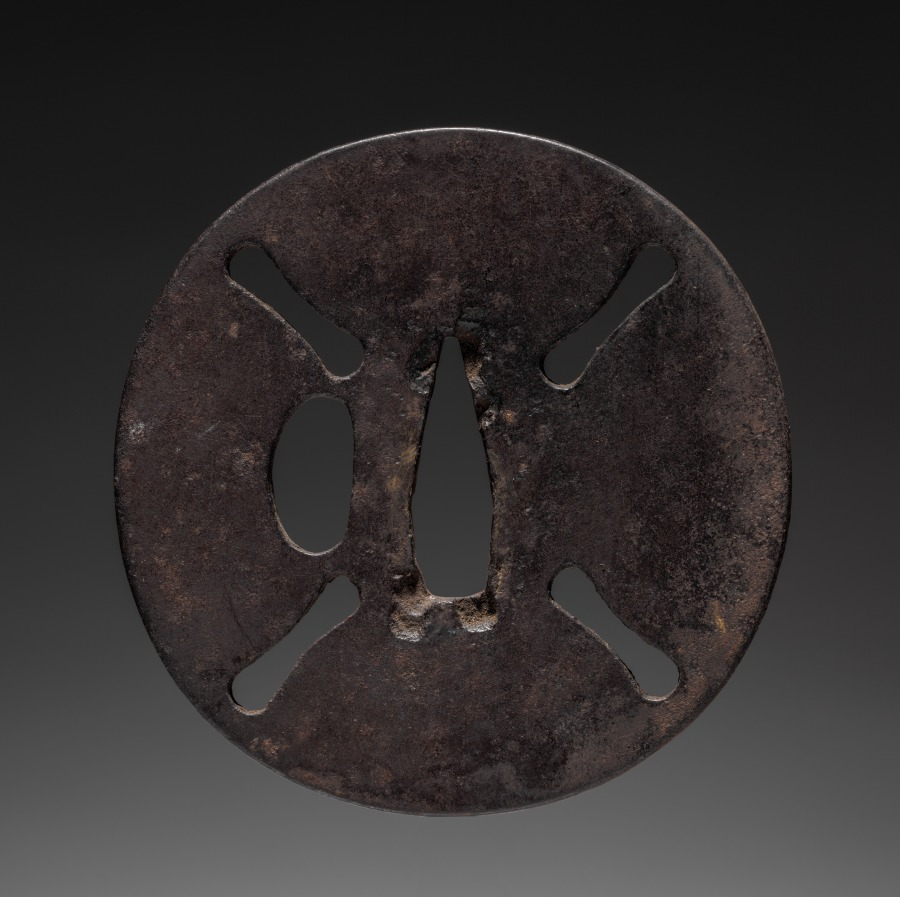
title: Sword Guard (Tsuba)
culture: Japan, possibly Edo period (1615-1868)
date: c. 1615–1868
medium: iron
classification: Arms and Armor